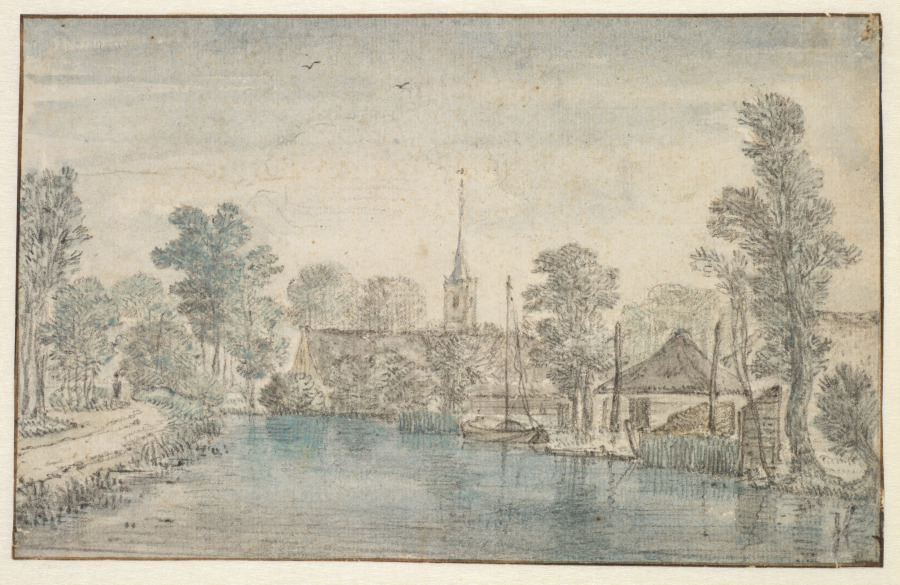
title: Village on a River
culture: Netherlands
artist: Jan Jansz den Uyl (Dutch, 1595/96–1639/40)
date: 1620–25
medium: black chalk, with transparent and opaque watercolor in blue, green-blue, gray, and ochre, framing line in brown ink on antique laid paper; framing line in brown ink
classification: Drawing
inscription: partial watermark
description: This small sheet by Jan Jansz. den Uyl shows the Amsterdam artist recording a scene that he probably encountered during a walk outside the city. Once back in his studio, he embellished the view with watercolors in blue, green, gray, and ochre. In the 1620s, when this was made, sketching landscape scenes on-site was still relatively new in the Netherlands. The drawing does not relate to any known work by Den Uyl, who was a noted still life painter, and he probably made it for his own pleasure.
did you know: In the 1620s, when this small drawing was made, sketching landscape scenes en plein air (on-site) was still relatively new in the Netherlands.